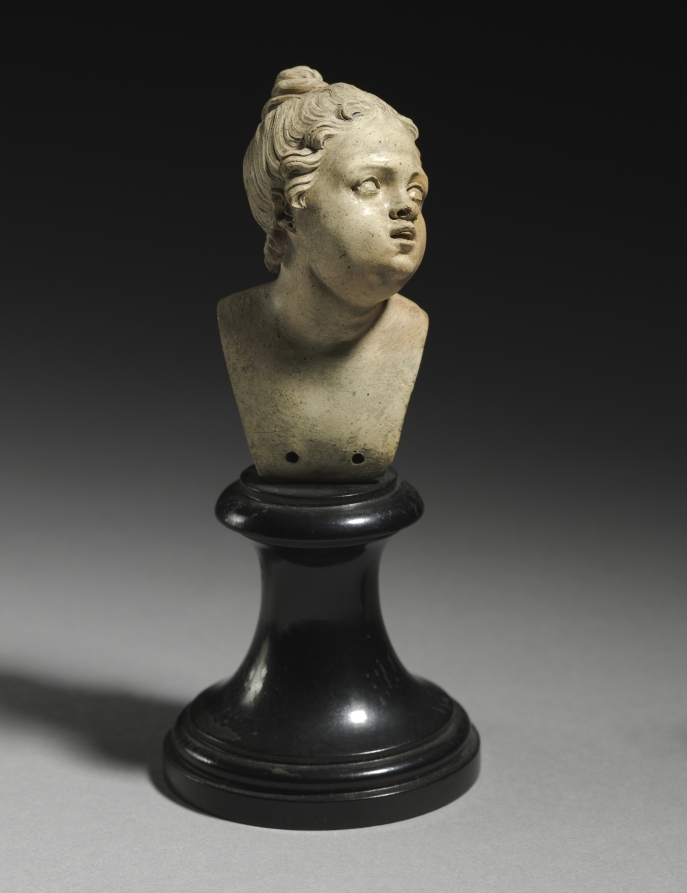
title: Head of a Woman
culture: Italy, Naples (?), early 19th Century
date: c. 1800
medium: terracotta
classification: Sculpture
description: Each of these miniscule terracotta busts has allegedly been formed by hand, though the precision of the detailed features implies that they have been cast from a mold. Details such as the meticulously executed facial features and the thin, exact rows of hair on each figure suggest a manufactured method of creation, yet the pair is deemed handmade. Furthermore, these figures lack any trace of fingerprints that handmade figures of this time typically bear. Small holes at the base of each bust suggest that the heads were once attached to bodies that may have been used as crèche figurines. The busts were created in Naples where large numbers of nativity scenes were produced around the turn of the nineteenth-century. The similarity in size to archetypal terracotta crèche figurines, as well as the vast production of nativities in Naples at this time lends to the possibility that these busts were created for a nativity scene.